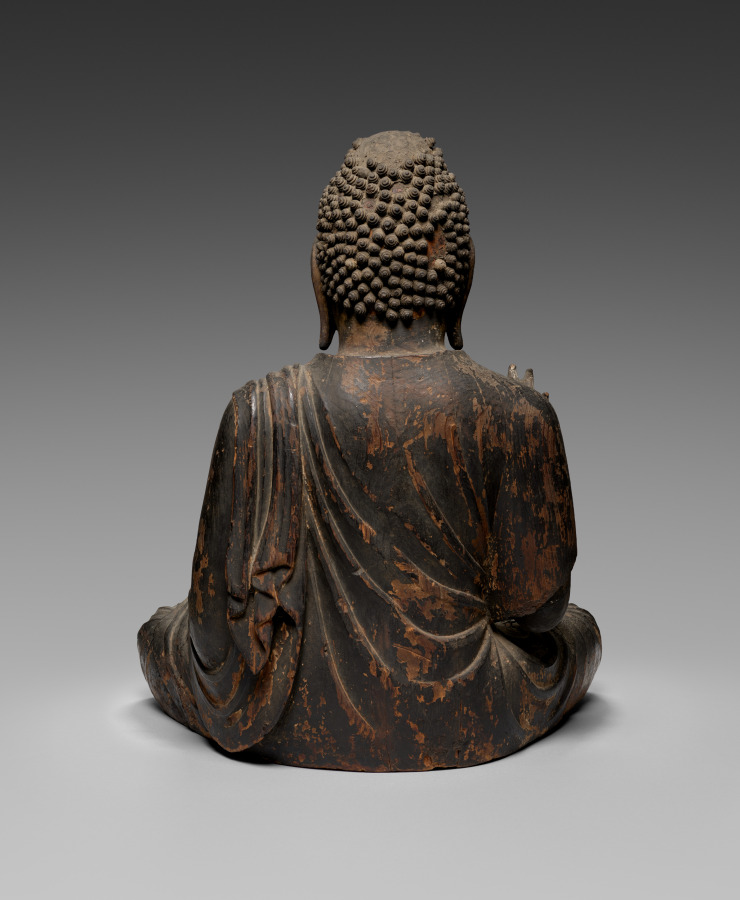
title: Shakyamuni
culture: Japan, Heian period (794–1185)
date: c. 900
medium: wood with lacquer and traces of color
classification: Sculpture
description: This image of Shakyamuni, the Buddha, or “awakened one,” who lived during the 500s or 400s BCE, is carved from one piece of wood. The distinctive pattern of thick, raised garment folds is characteristic of Japanese Buddhist sculpture of the 800s and 900s. Shakyamuni’s elongated ears and curled hair are among the physical attributes described in sacred texts that distinguish him as a Buddha.